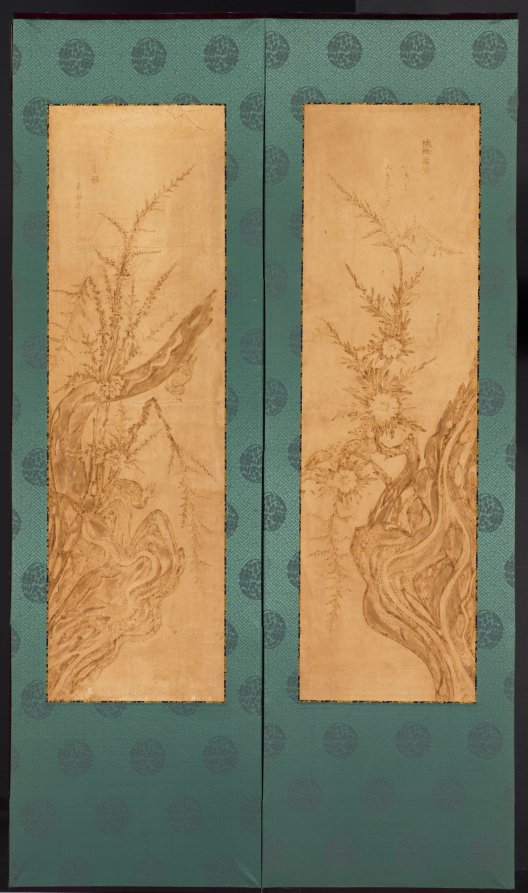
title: Birds and Flowers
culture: Korea, Joseon dynasty (1392–1910)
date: late 1800s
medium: Ten-panel folding screen with designs and inscriptions burnt into paper (pyrography)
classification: Painting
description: The image depicted on this folding screen is not executed in ink, but rather a method called “pyrography" or "nakhwa,” a technique of burning the surface of materials ranging from wood to paper with the delicately controlled application of a heated metal tool. This technique became widely popular in the 19th century. Scorched marks here replace brush strokes. Nakhwa method is now designated as a Korean Intangible Cultural Asset by the Korean government.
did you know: The painting is done by a pyrography method, a technique of burning the surface of materials with a heated tool.